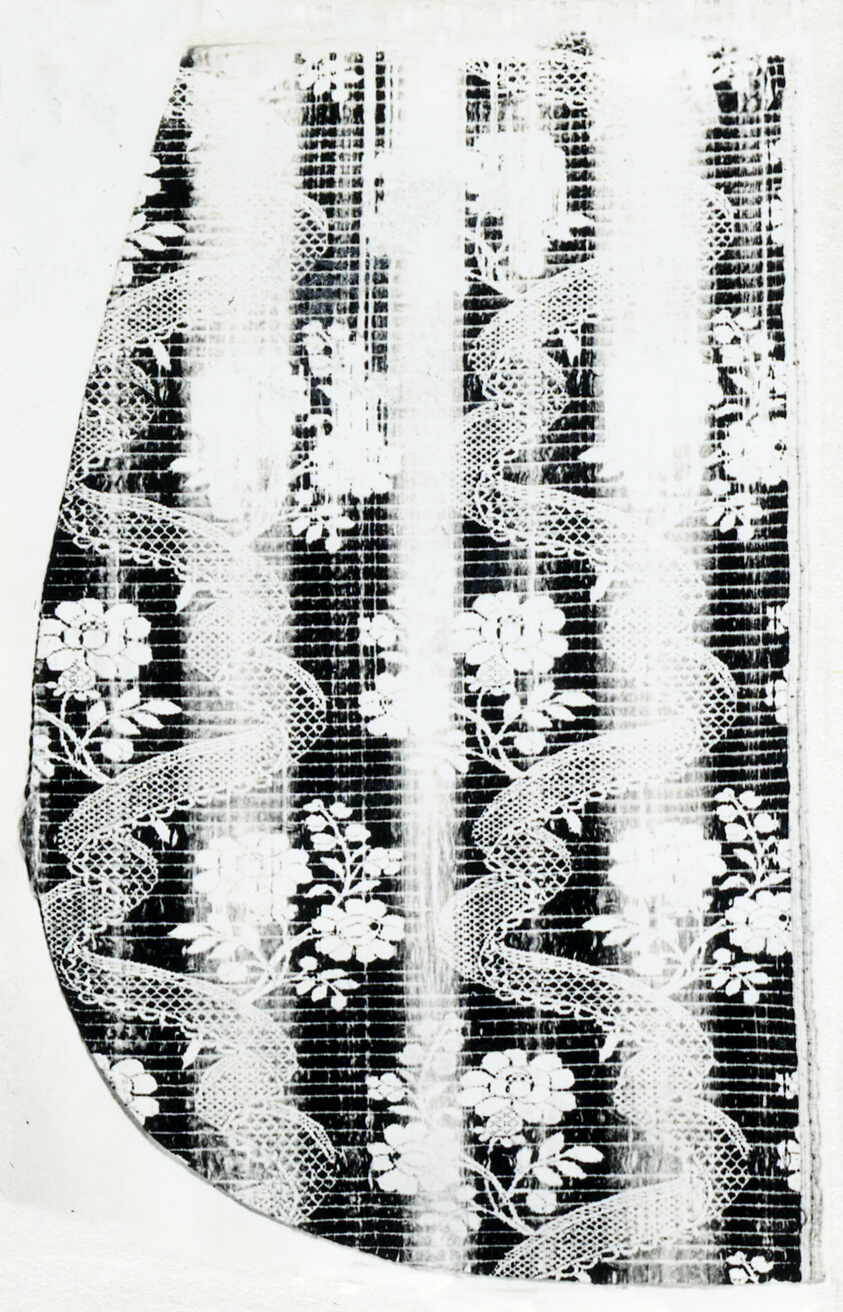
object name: Textile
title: Fragment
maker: France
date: Late 18th century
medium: plain compound cloth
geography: France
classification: textile; weaving